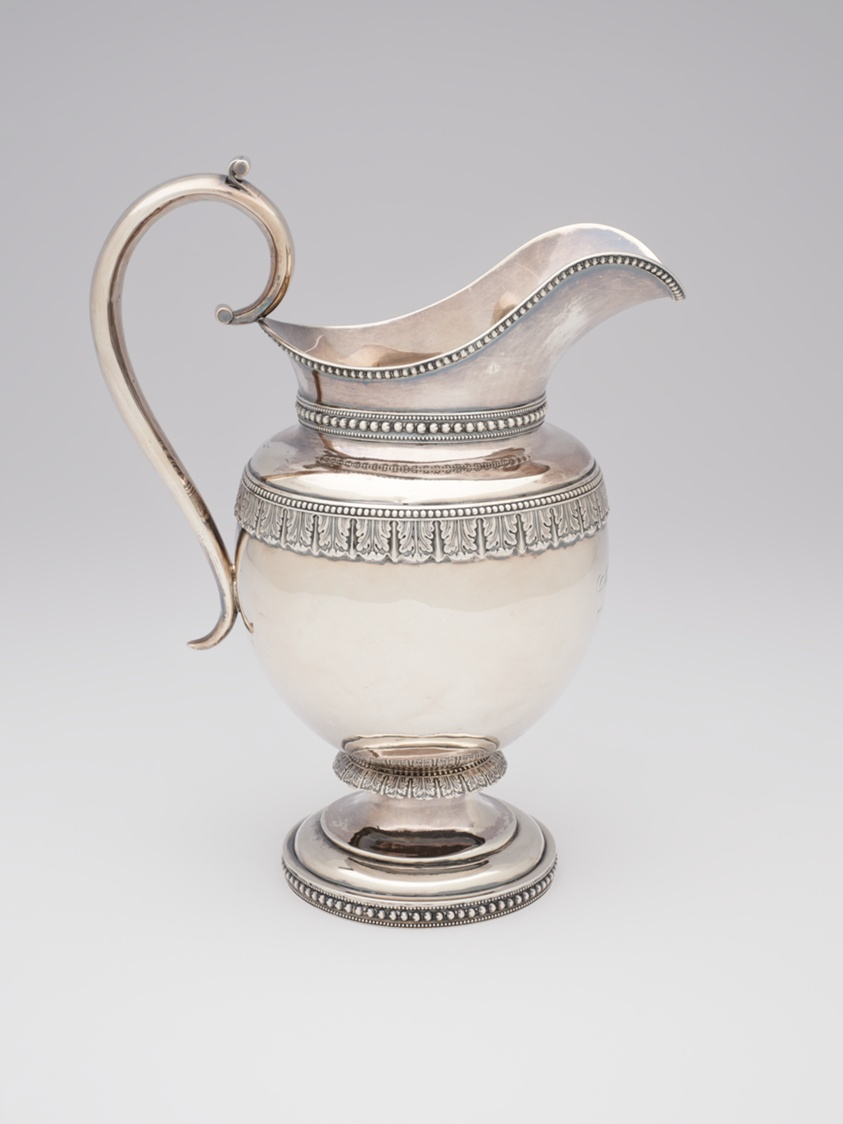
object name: Metalwork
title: Pitcher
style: 19th century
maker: Retailed by Baldwin Gardiner (American, 1791–1869); New York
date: 1827–48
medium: Silver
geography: New York City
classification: pitcher (vessel); silver; decorative arts